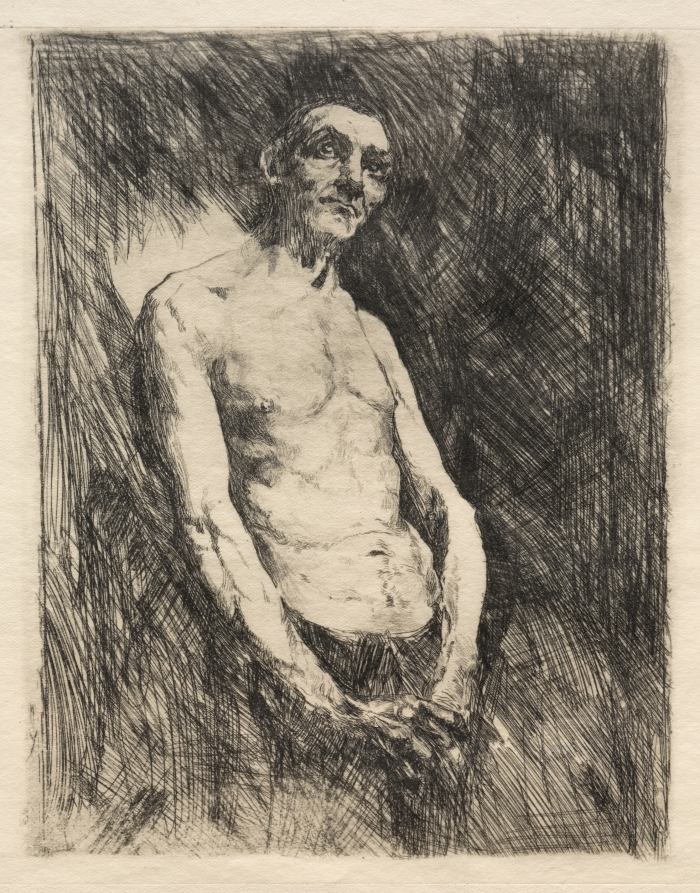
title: Half Nude Figure of a Man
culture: America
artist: Robert Frederick Blum (American, 1857–1903)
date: 1800s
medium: etching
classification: Print